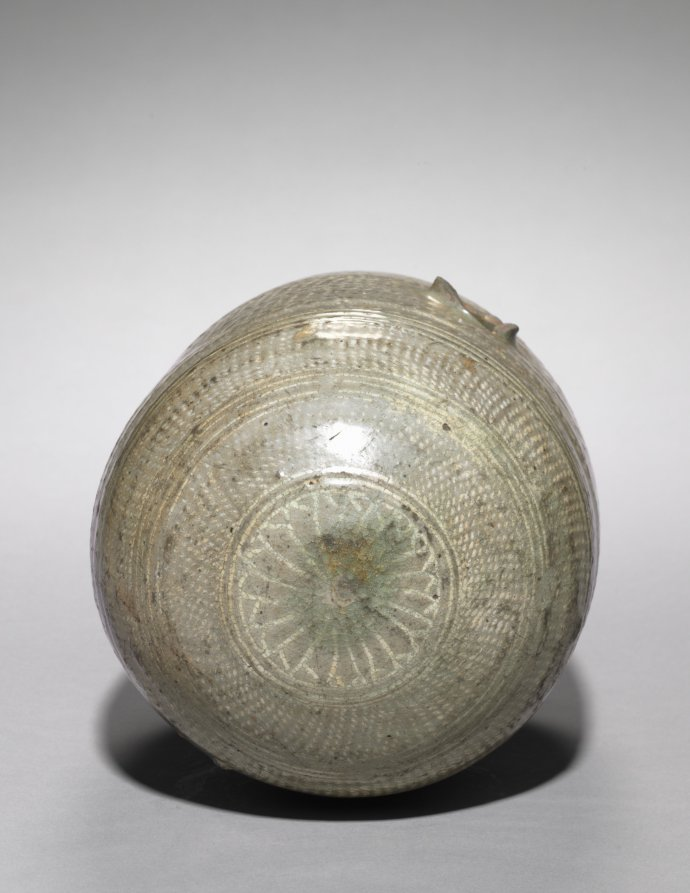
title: Wine Cask with Stamped Floral Decoration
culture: Korea, Joseon dynasty (1392–1910)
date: 1400s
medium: pottery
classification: Ceramic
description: A cask-shaped vessel, such as this work, is believed to have stored different kinds of liquids, including wine, sesame oil, and even water. Having its small mouth in the middle made it useful for not only storing a beverage but also carrying it to a ritual or ceremonial site. To make this work, the artist first applied white slip, then used inlaid and stamped techniques as decorative patterns. Such repetitive and tactile expressions inspired many Korean modern and contemporary ceramic artists in response to the global trend of Abstract Expressionism.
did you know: In order to transfer liquid safely without spilling, the mouth of this vessel is small and placed in the middle.